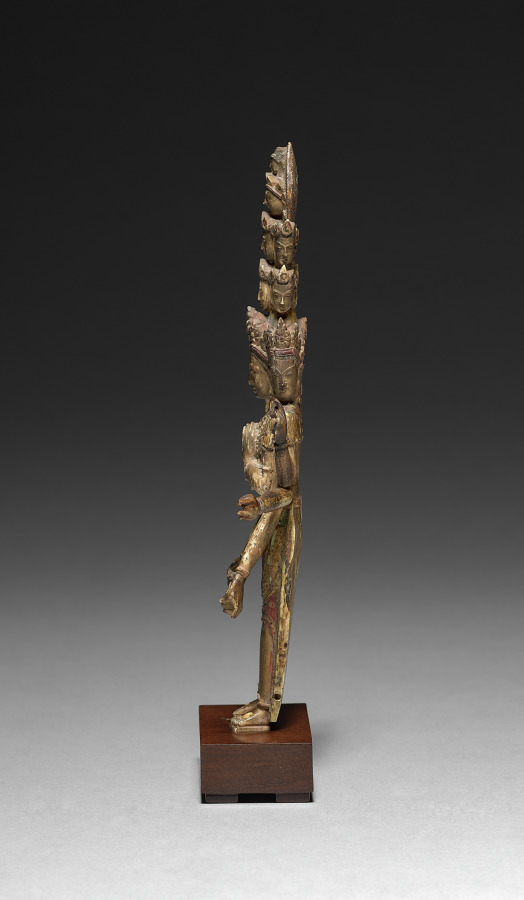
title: Eleven-Headed Avalokitesvara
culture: Nepal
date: 1500s–1600s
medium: painted ivory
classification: Ivory